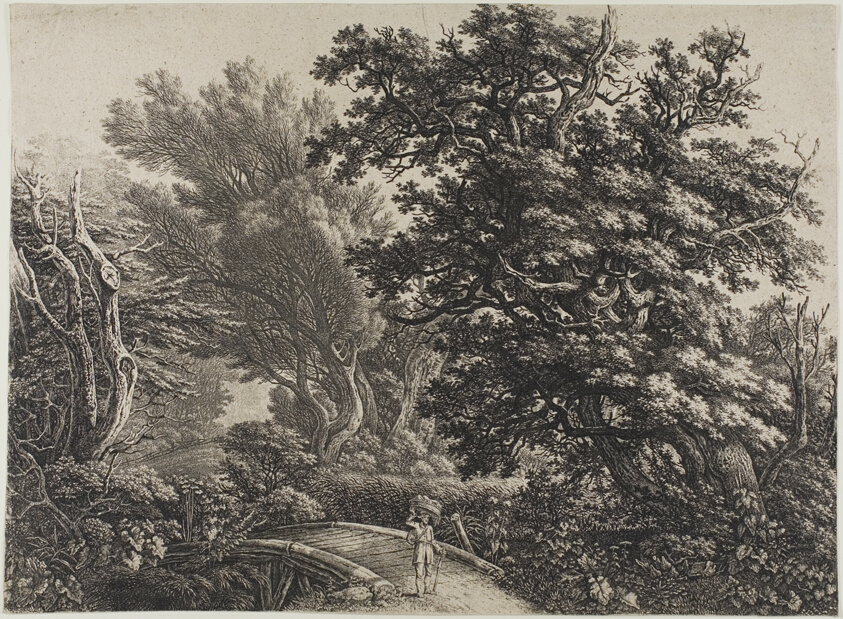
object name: Print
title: Rustic Bridge in a Tangled Wood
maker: Carl Wilhelm Kolbe, the elder (German, 1759-1835)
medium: Etching on paper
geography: Germany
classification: etching; print; prints and drawing